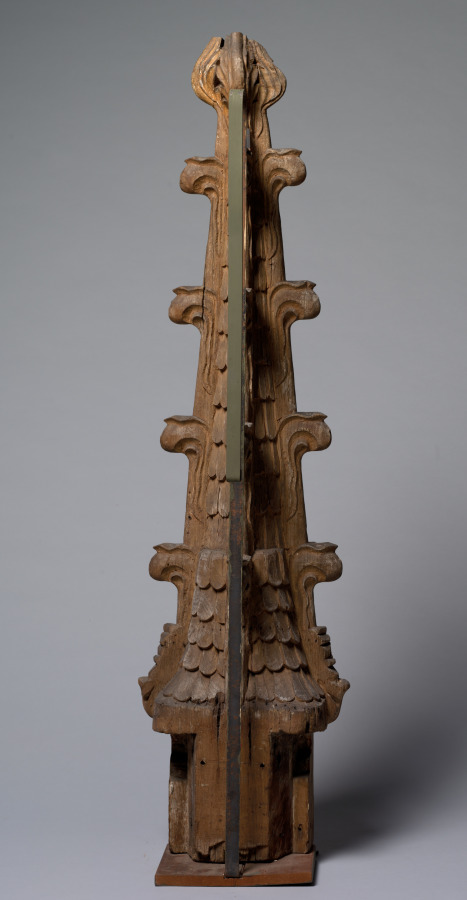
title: Pinnacle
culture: France, 15th century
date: 1400s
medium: oak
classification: Furniture and woodwork